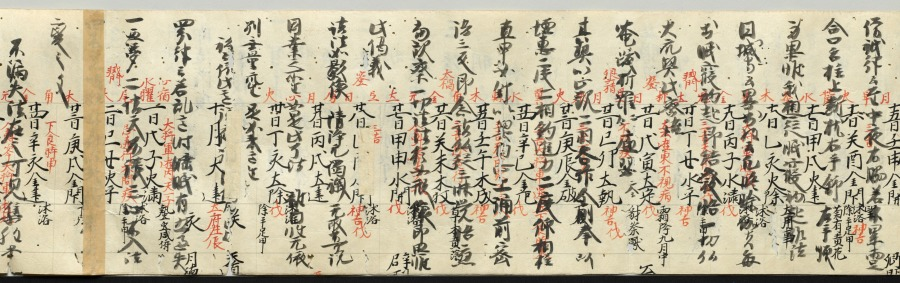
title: Scroll of Miscellaneous Notes written on a Calendar by Priest Seigen (verso)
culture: Japan, Kamakura period (1185–1333)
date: c. 1200–1231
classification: Manuscript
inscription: bears miscellaneous notes written by Priest Seigen.